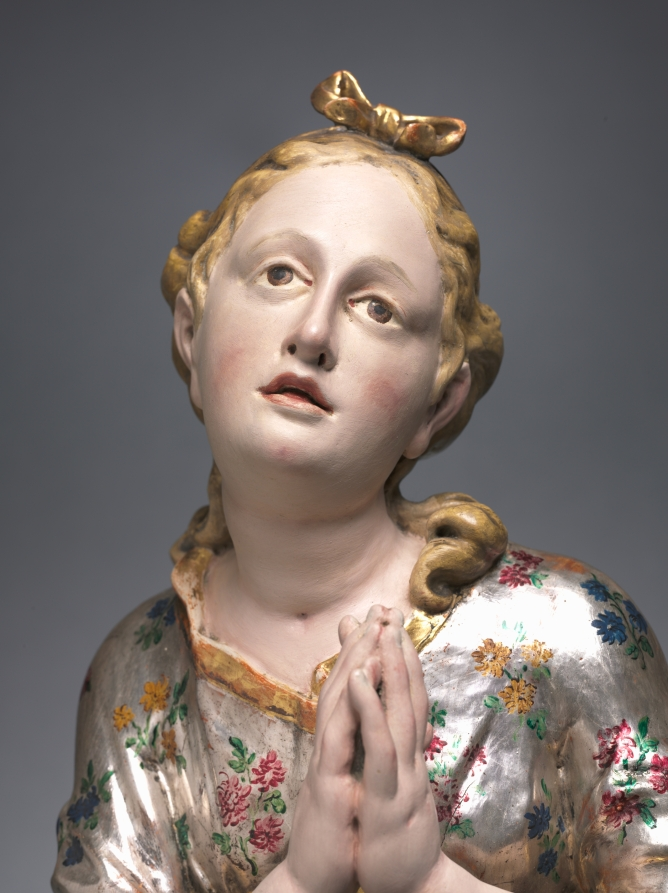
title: Virgin Mary as a Child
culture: Austria, Vienna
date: 1750–75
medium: painted and gilded wood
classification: Sculpture